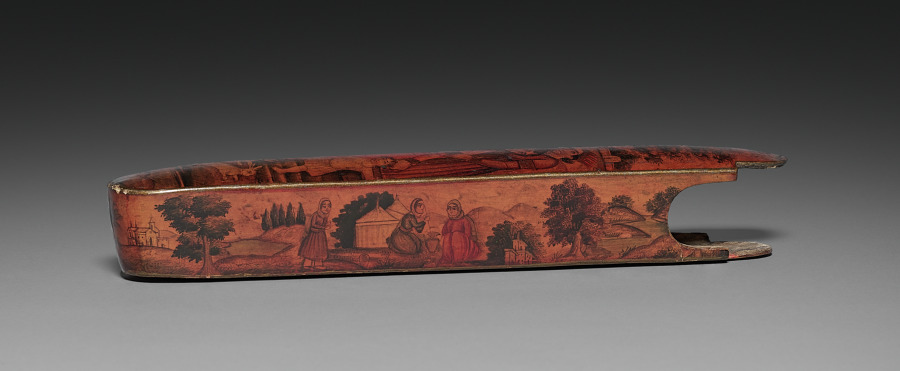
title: Pen and Ink Box (lid)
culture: Iran, Qajar period (1779-1925)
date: 1800s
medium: lacquer over papier maché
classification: Lacquer